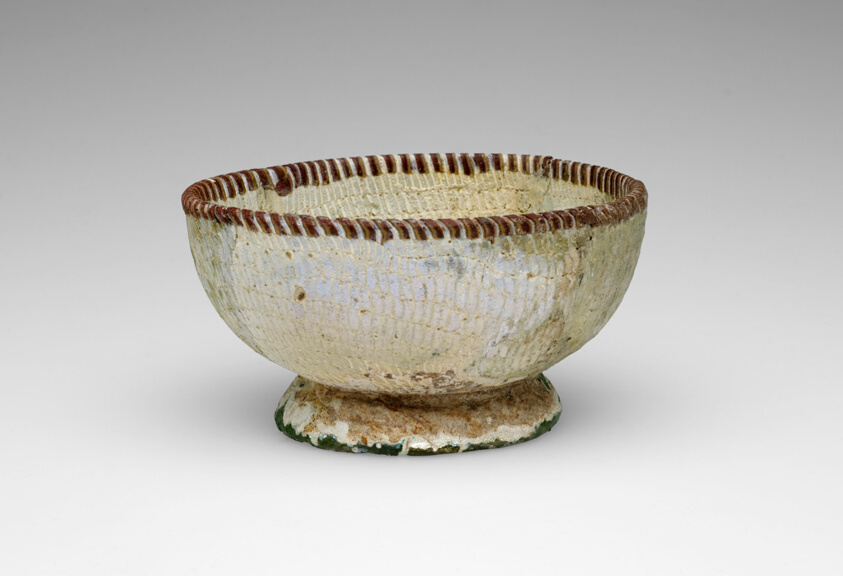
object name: Vessel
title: Bowl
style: roman (ancient, style or period), ancient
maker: Roman; probably Eastern Mediterranean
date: Early 1st century BCE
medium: Glass, mosaic glass technique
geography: Italy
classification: bowl; glass; vessel; ancient art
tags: bowl